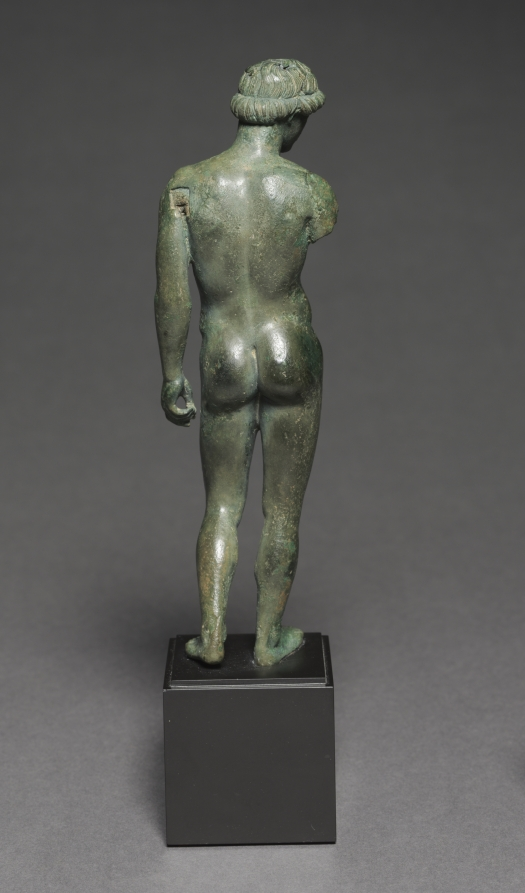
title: Athlete Making an Offering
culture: Greece, probably from workshop of Locri or Tarentum, Classical Period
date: c. 450–425 BCE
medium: bronze (hollow cast)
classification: Sculpture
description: Standing in a classic contrapposto pose, with one leg straight and weight-bearing, the other bent and relaxed, this athlete pauses after victory. He turns his head gently, looking down to make an offering with his lost right hand. At the sites of their victories and in their home cities, champion athletes were often honored with such sculptures, glorifying the strength and beauty of the male form at both small and large scale.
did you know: The missing right arm and hand of this athlete were cast separately and attached.